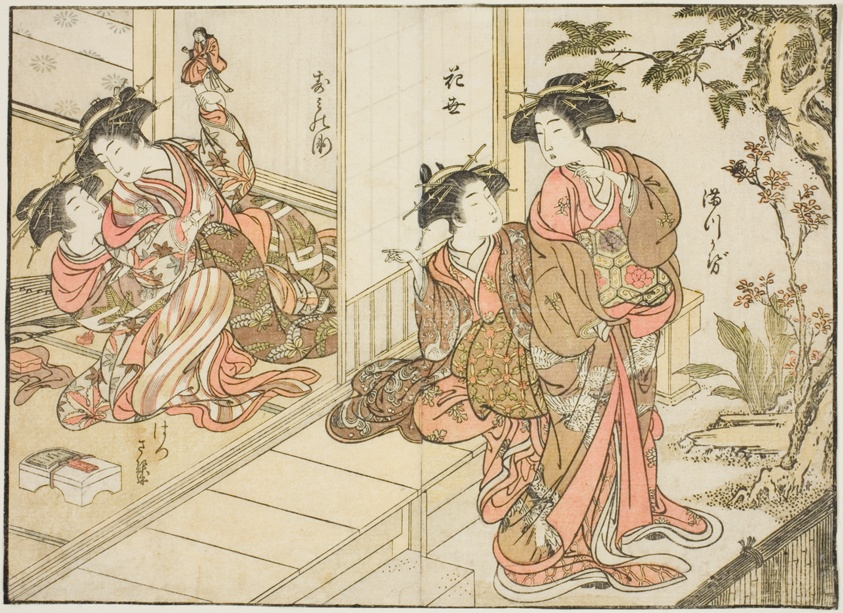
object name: Print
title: Courtesans of Maruebiya, from the book "Mirror of Beautiful Women of the Pleasure Quarters (Seiro bijin awase sugata kagami)," vol. 2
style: Japanese (culture or style)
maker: Katsukawa Shunsho; Japanese, 1726-1792; Kitao Shigemasa; Japanese, 1739-1820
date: 1776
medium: Color woodblock print; double-page illustration cut from a book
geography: Japan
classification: woodblock print; print; asian art